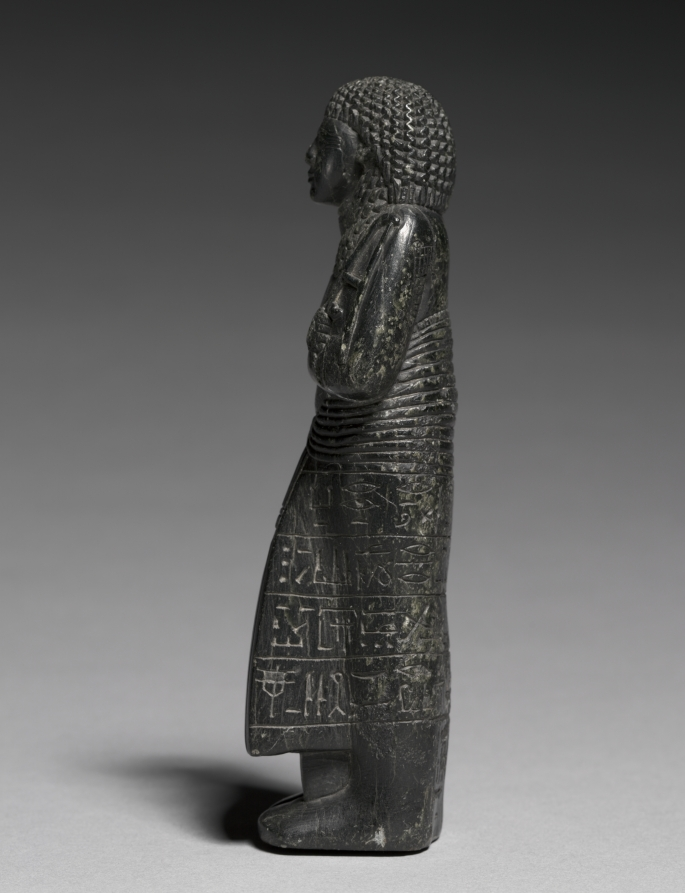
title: Shawabty of Nebmehyt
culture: Egypt, New Kingdom (1540–1069 BCE), Dynasty 19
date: c. 1295–1240 BCE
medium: steatite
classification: Funerary Equipment